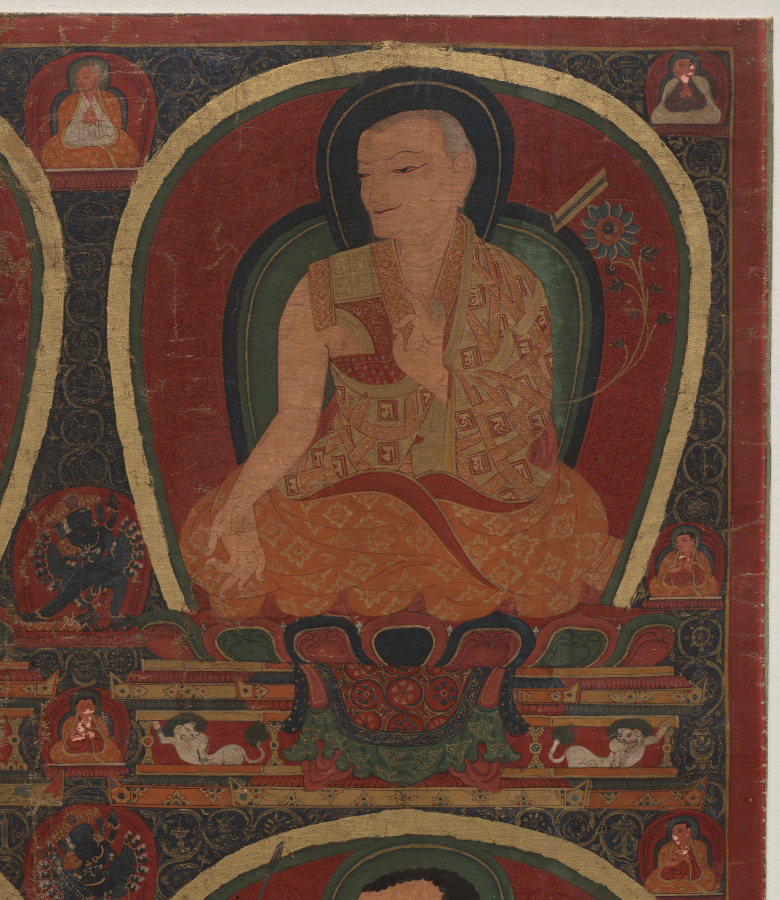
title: Four seated Masters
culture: Central Tibet, Ngor monastery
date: c. 1450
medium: Gum tempera and gold on cotton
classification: Painting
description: Founders and prominent masters of the Sakya order of Buddhism in Tibet are featured in this painting as part of the lineage of teachers who transmitted knowledge of their fundamental text, the Hevajra Tantra. It is part of a series of paintings made at one of the main Sakya monastic centers, which had close ties with Nepal. This Tibetan artwork includes Nepalese features, such as the delicate, decorative quality of the painting, its two-dimensionality, the exaggerated curvature of the upper eyelid, and the filling of all spaces with scrollwork.